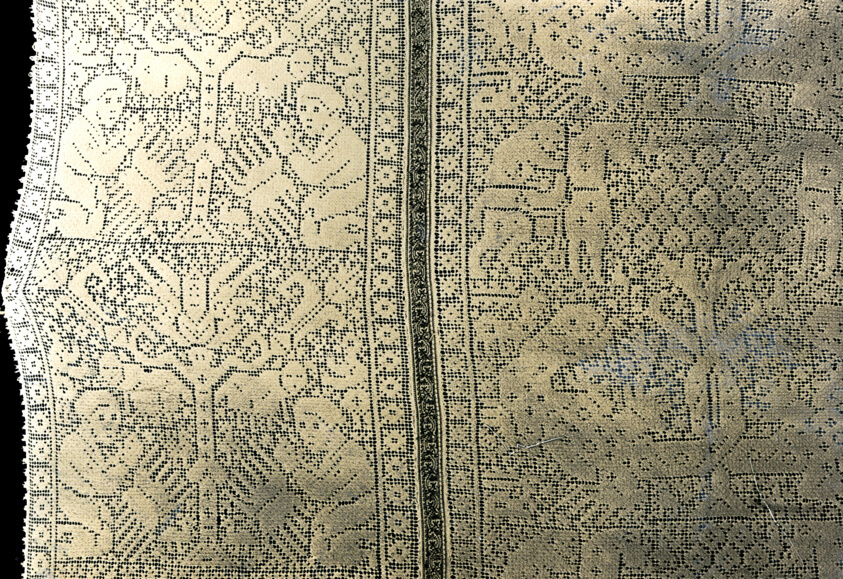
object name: Textile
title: Table Cover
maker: Spain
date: 18th/19th century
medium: Filet lace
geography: Spain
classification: textile; needlework (visual works)